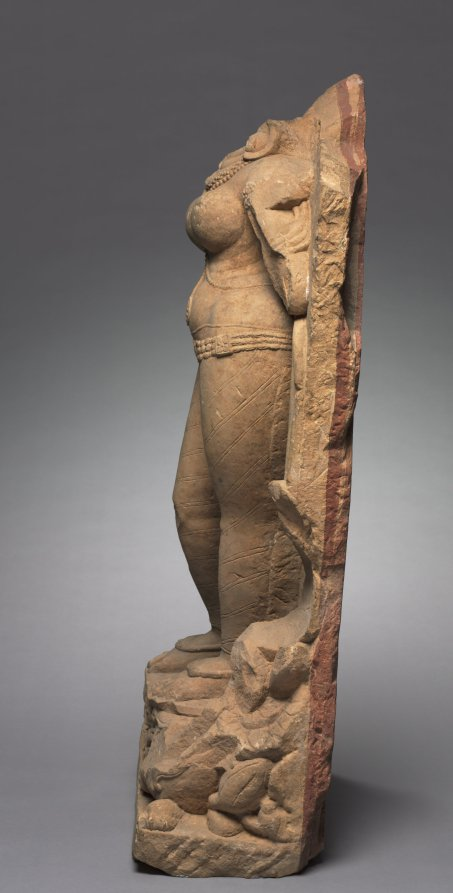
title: River Goddess Ganga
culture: Northern India, Uttar Pradesh, Mathura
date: c. 700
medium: sandstone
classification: Sculpture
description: The Ganges River that runs from the Himalaya Mountains east to the Bay of Bengal is India's most sacred river. Hindu myths tell of how the god Shiva held out a lock of his hair to catch the fall of the heavenly river, identified with the Milky Way, so that it would trickle gently to earth. The river is personified as the goddess Ganga, and since she flows eternally through the hair of Shiva, the river is considered holy. Sculptures of Ganga were placed at the doorway of temples, for the image of the purifying waters symbolically cleanses those who enter the sacred space. She stands on a crocodile-like creature called makara, here shown with a fancifully foliated tail.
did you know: The vein of red sandstone visible in the broken top locates the source as a quarry near Mathura.